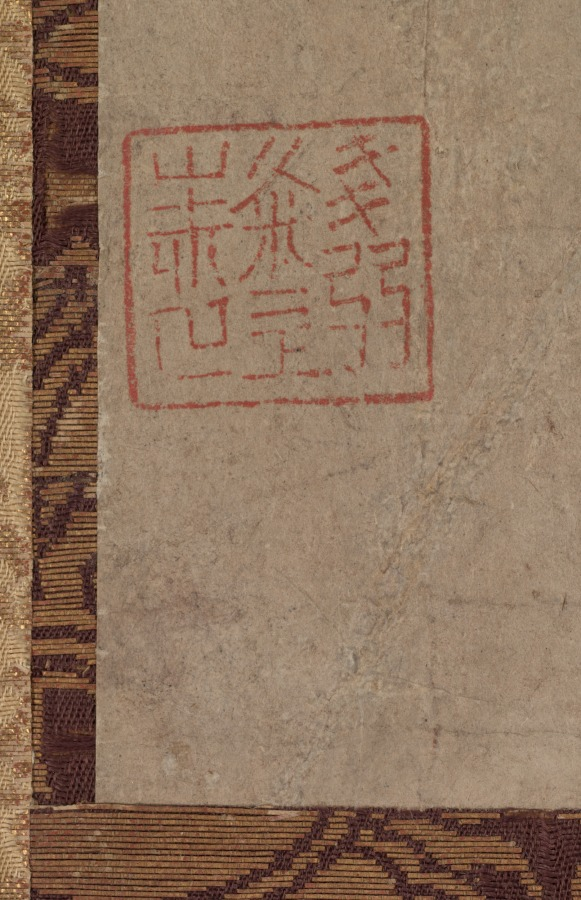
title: Crow on a Pomegranate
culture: Japan, Muromachi period (1392–1573)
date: 1500s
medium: hanging scroll; ink on paper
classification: Painting